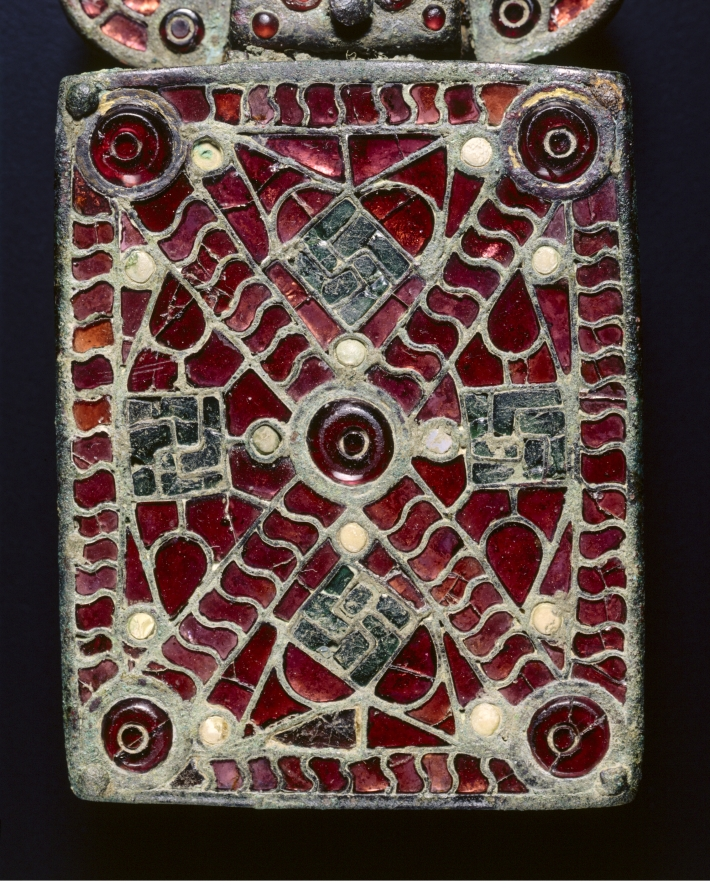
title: Belt Buckle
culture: Visigothic, Spain, Migration Period, 6th century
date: c. 525–560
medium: bronze with garnets, glass, mother of pearl, gold foil, traces of gilding; bronze and glass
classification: Jewelry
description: The art of the European Migration Period (3rd-7th centuries AD) is almost exclusively one of personal adornment-a portable art that followed men and women to their graves. Belt buckles with large rectangular attachment plates have been discovered in cemeteries across the Iberian Peninsula-now occupied by Spain and Portugal-from the period of Visigothic occupation (about AD 412-711). Their decoration varies. Finer examples, like this one, are distinguished by brilliantly inlaid semi-precious stones and colored glass. Garnets were especially prized in Visigothic society for use in cloisonné jewelry. The technique involved the fitting of carefully cut pieces of polished garnet into an intricate grid of compartments, or cloisons. This buckle is so densely inlaid with garnets that it presents a virtual "carpet" of red to the eye. These large Visigothic buckles are strikingly uniform in shape yet endlessly varied in surface design, perhaps a sign that they expressed the personal identities of their original owners. Grave excavations have shown that belt buckles of this type were made for women.